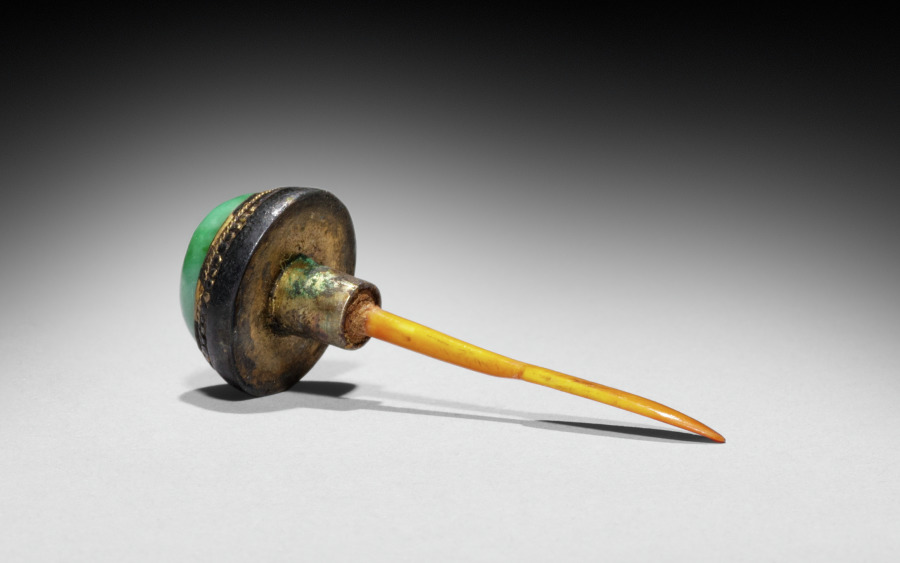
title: Flattened Ovoid Snuff Bottle with Stopper (stopper)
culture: China, Qing dynasty (1644-1911), Jiaqing reign (1796-1820)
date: 1796–1820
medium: porcelain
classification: Ceramic